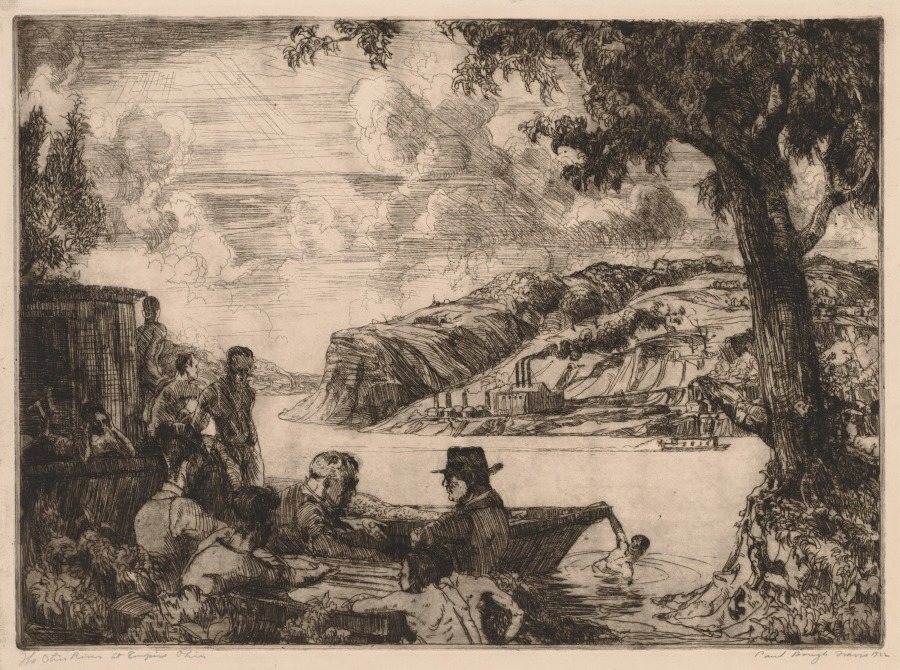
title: Ohio River at Empire, Ohio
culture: America, Ohio, Cleveland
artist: Paul B. Travis (American, 1891–1975)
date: 1922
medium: etching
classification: Print